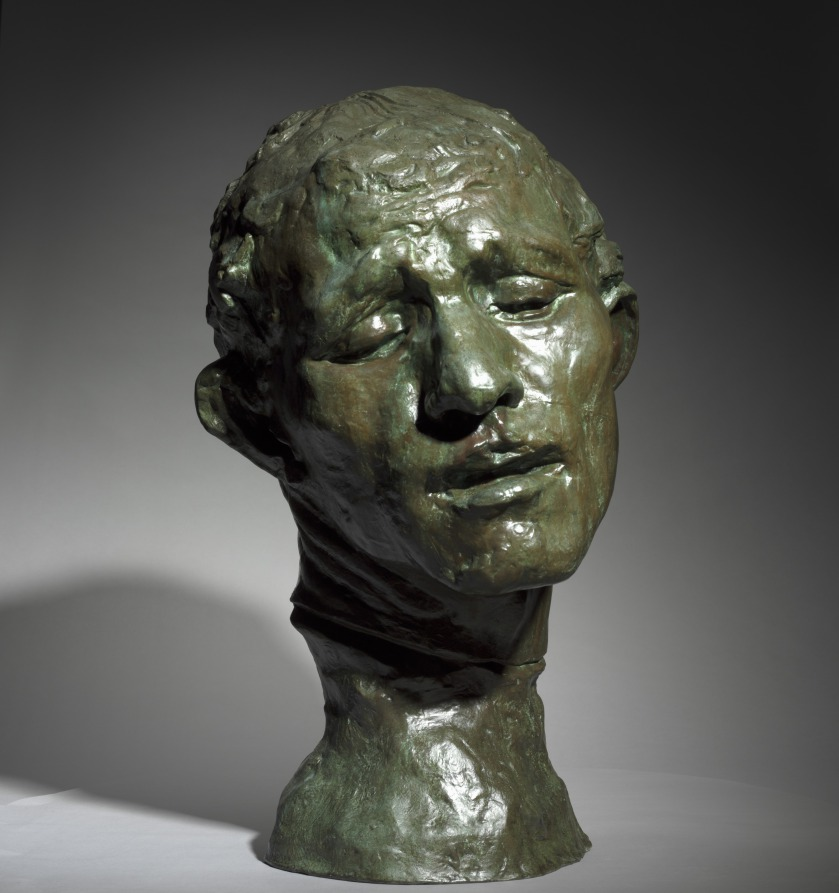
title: Heroic Head of Pierre de Wissant, One of the Burghers of Calais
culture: France, 19th century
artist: Auguste Rodin (French, 1840–1917)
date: 1886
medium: bronze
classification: Sculpture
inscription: inscribed at neck, left: A.Rodin; inscribed lower back: Alexis Rudier/Fondeur-Paris.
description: This sculpture depicts one of the figures in Rodin’s large public monument The Burghers of Calais (1884–89), featuring six French men who volunteered to be taken prisoner by the English in exchange for lifting the siege of Calais during the Hundred Years War (1337–1453). Pierre de Wissant’s anguished expression suggests extreme mental suffering as he contemplates his expected execution. Rodin exhibited a life-size version of the figure as an independent work before completing the monument. He later made multiple versions in various sizes and media.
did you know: This sculpture depicts the head of a figure from Rodin's large public monument The Burghers of Calais (1884-89). The CMA also owns a plaster version of the head.